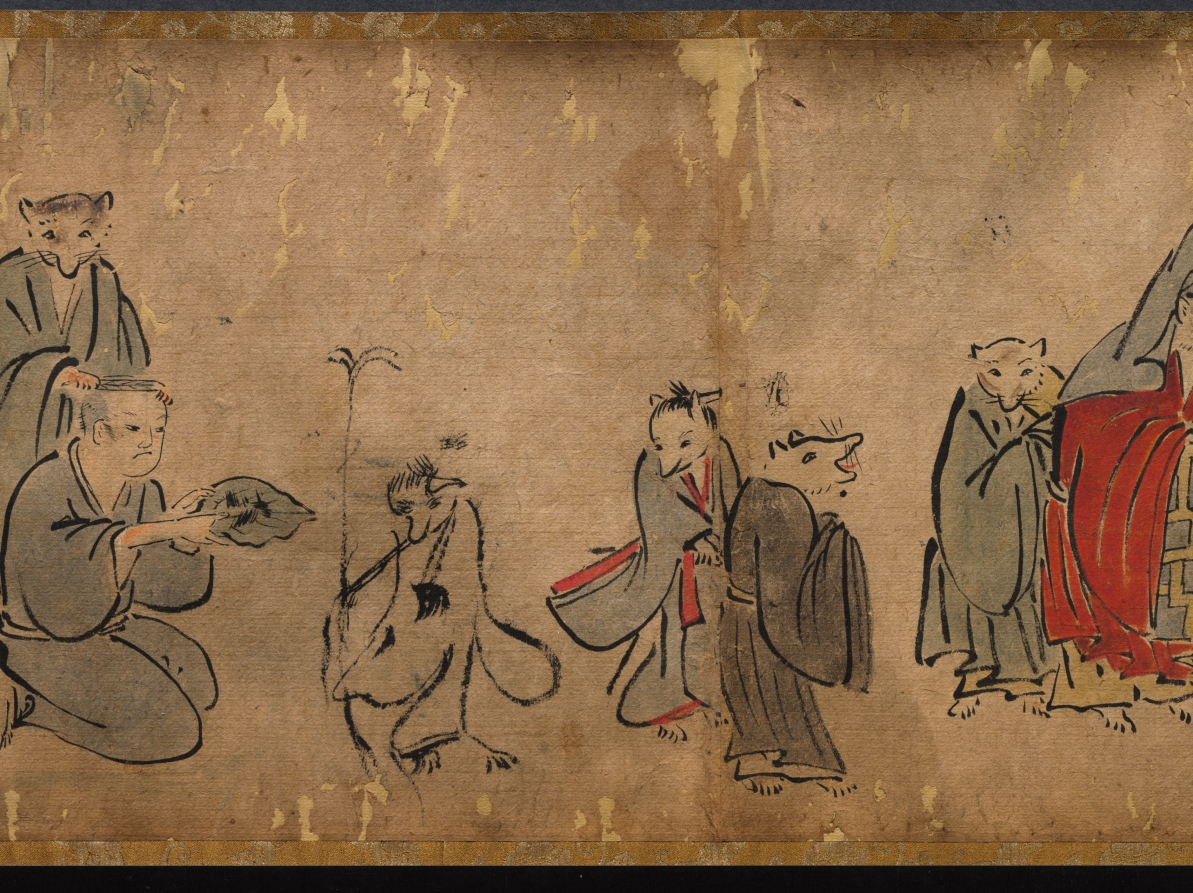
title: The Illustrated Tale of Oishi Hyōroku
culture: Japan, Edo period (1615–1868)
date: 1700s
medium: handscroll; ink and color on paper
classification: Painting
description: This incomplete handscroll illustrates part of the story of Oishi Hyoroku, a young man tasked with battling fox apparitions who were creating problems in his town. In other extant versions of the scroll, the story is set in the fall of 1624 in Kagoshima in southern Japan. Throughout the story, Hyoroku is tricked and terrified by the foxes that shift their shapes into a variety of monstrous phantoms. After repeated humiliations, he eventually captures two of the foxes. In this version, colloquial texts that function like text blurbs in comics appear throughout the scroll, but the main text is missing.